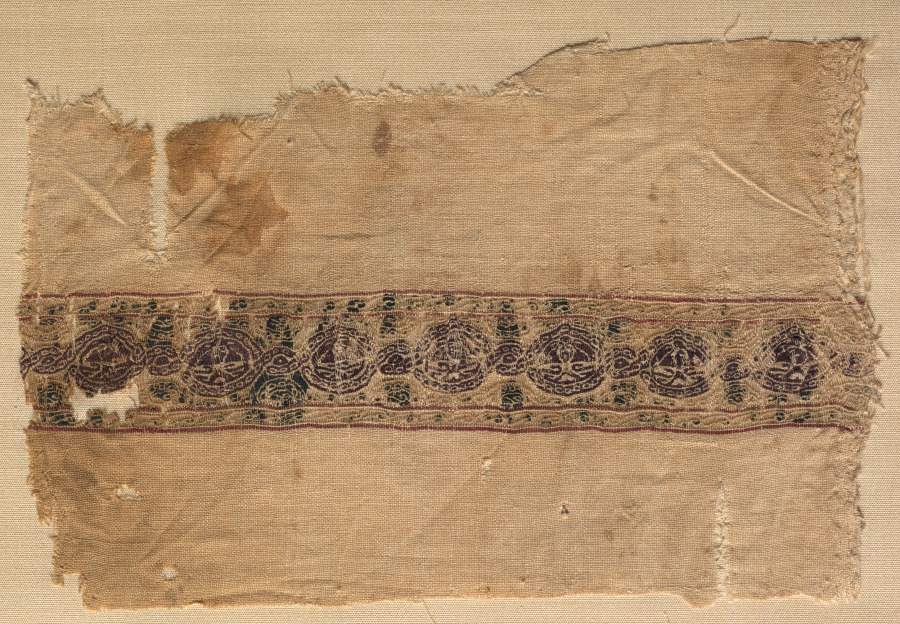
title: Fragment of a Tiraz-Style Textile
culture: Egypt, Fatimid period, Caliphate of al-Hafiz or later, AH 524-565 (A.D. 1130-1169)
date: 1130 – 1169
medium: tabby ground with inwoven tapestry ornament; linen and silk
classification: Textile